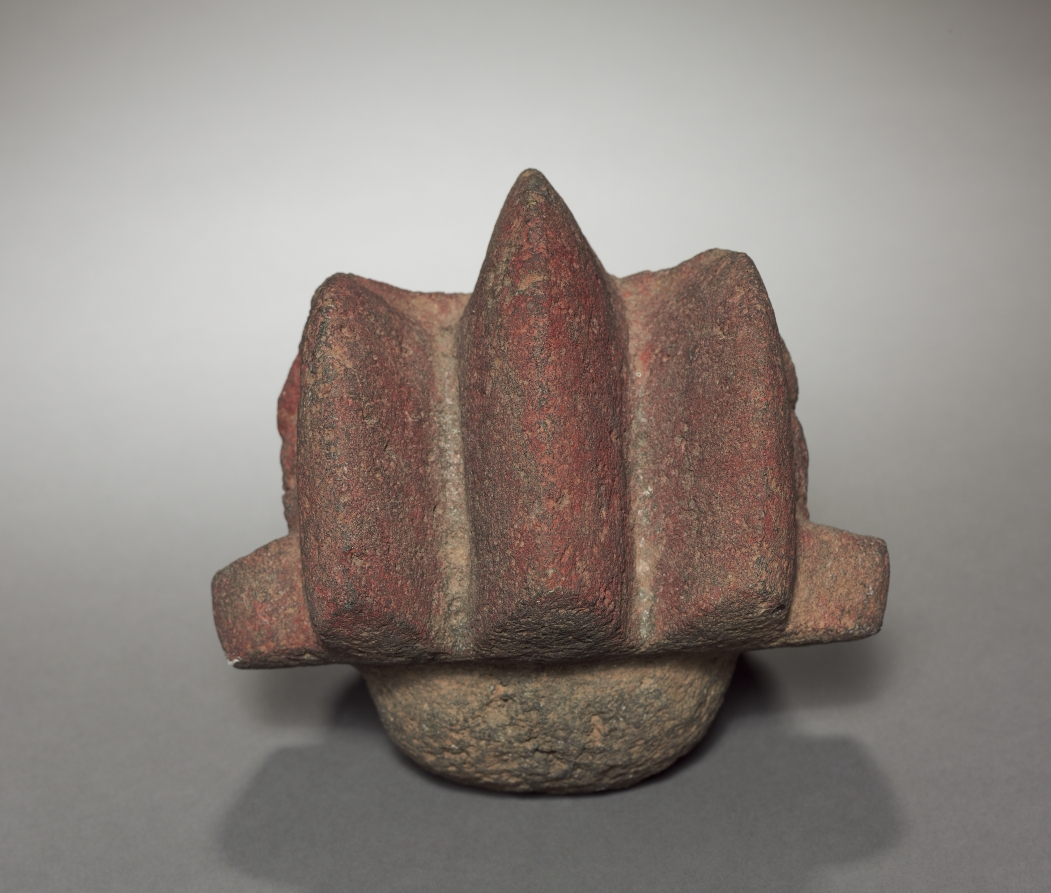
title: Head Hacha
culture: Mexico, Veracruz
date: 300–900 CE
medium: gray volcanic stone with red pigment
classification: Sculpture